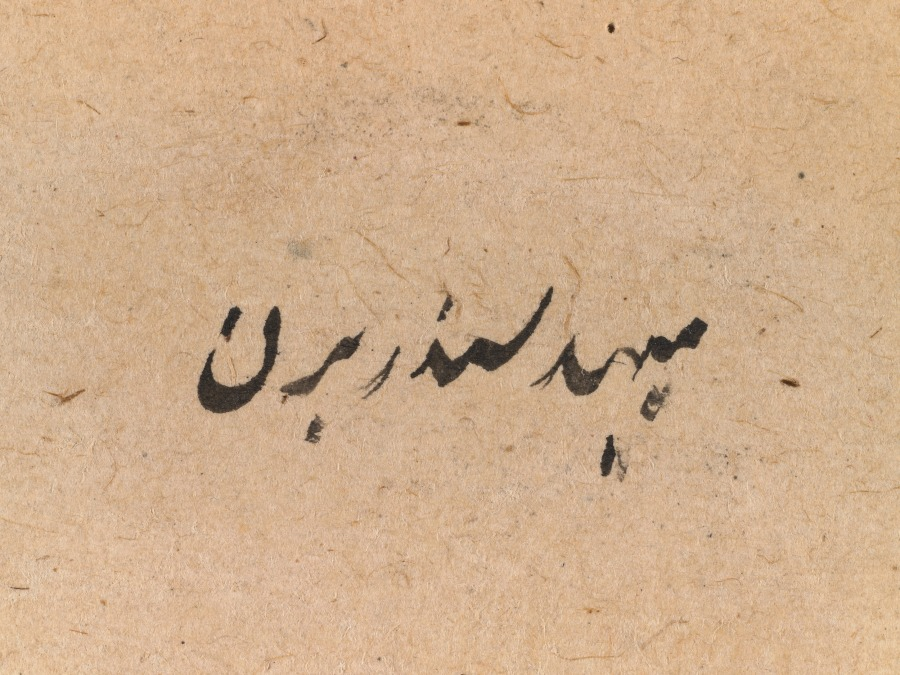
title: A royal ram with a gold chain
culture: India, Mughal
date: c. 1585; border added probably 1700s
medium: Gum tempera and gold on paper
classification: Painting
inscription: Urdu inscription at top, in nasta‘liq script: sheep; Hindi inscription under left corner of painting, in devanagari script: Shri 6; Hindi inscription below painting, in devanagari script: 2, sheep; Hindi inscription, bottom center, in devanagari script: 674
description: The ram in this painting is a particularly well-groomed animal that was probably kept in the royal menagerie and attended to by special keepers. The puffs of hair on the ram’s back have been colored with henna, and he wears a decorative chain of bells across his chest. The Mughal rulers collected and exhibited specimens of various animals from their territories out of a scientific interest as well as a desire to display the extent of their influence over the land and its inhabitants.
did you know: Sheep with black and white markings like this are called Jacob sheep.